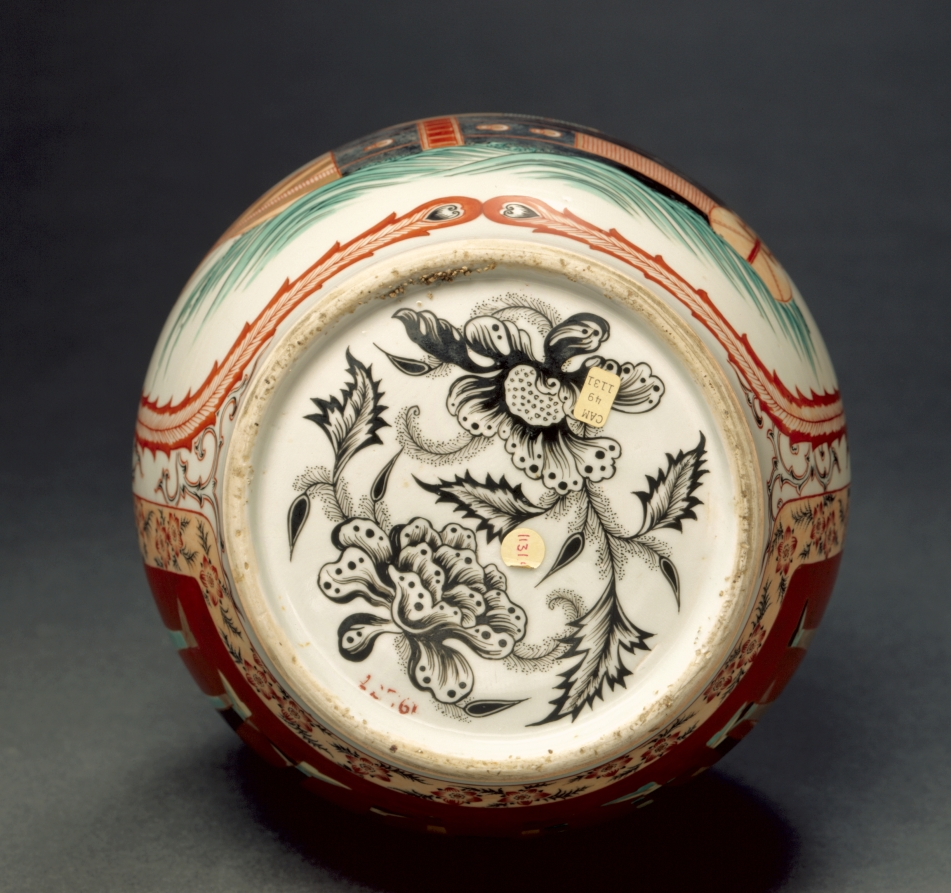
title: Bottle with Western Ships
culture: Japan, Edo period (1615–1868)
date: c. 1800–1868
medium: Porcelain with decoration in colored enamels and underglaze blue, overglaze enamels, and gold (Hizen ware, Arita type)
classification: Ceramic